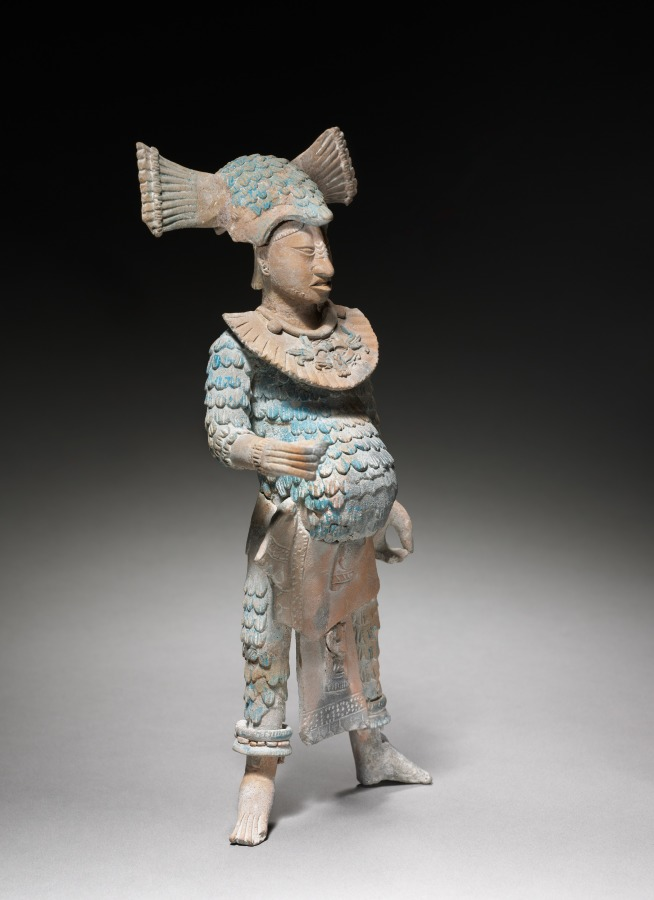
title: Warrior Figurine with Removable Headdress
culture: Mexico, Yucatán, Jaina Island region, Campeche, Maya style (250-900)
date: 600–900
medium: earthenware with pigment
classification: Sculpture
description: The major offerings placed in the Maya graves of Jaina Island were ceramic figurines, some of Mesoamerica's finest, that depict deities and humans in a variety of roles. This warrior, his headdress removable, once probably held weapons and wears either quilted cotton armor or the feathered uniform of a military order. We don't know why such figures are often pot-bellied.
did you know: Maya blue pigment was made by combining clay with indigo in a complex technique developed around the ninth century.